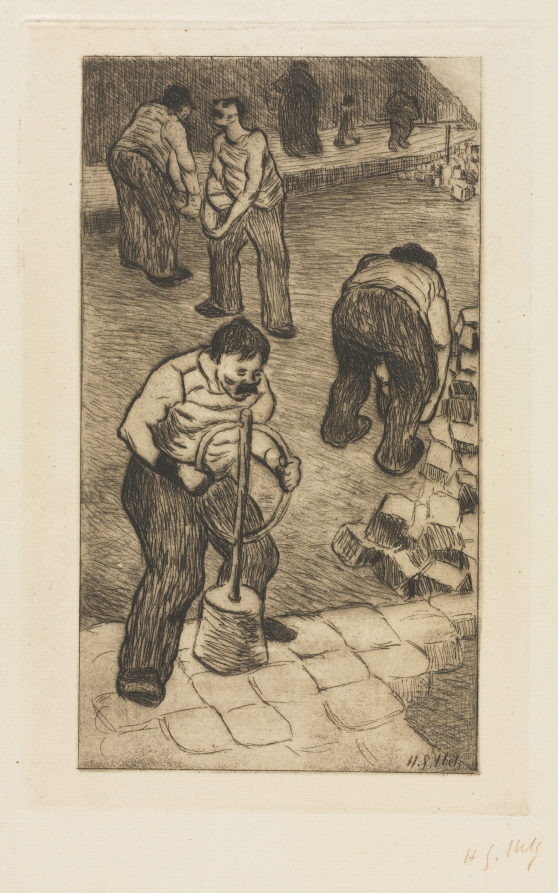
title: The Street Pavers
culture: France, 19th century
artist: Henri Gabriel Ibels (French, 1867–1936)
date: 1894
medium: etching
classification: Print